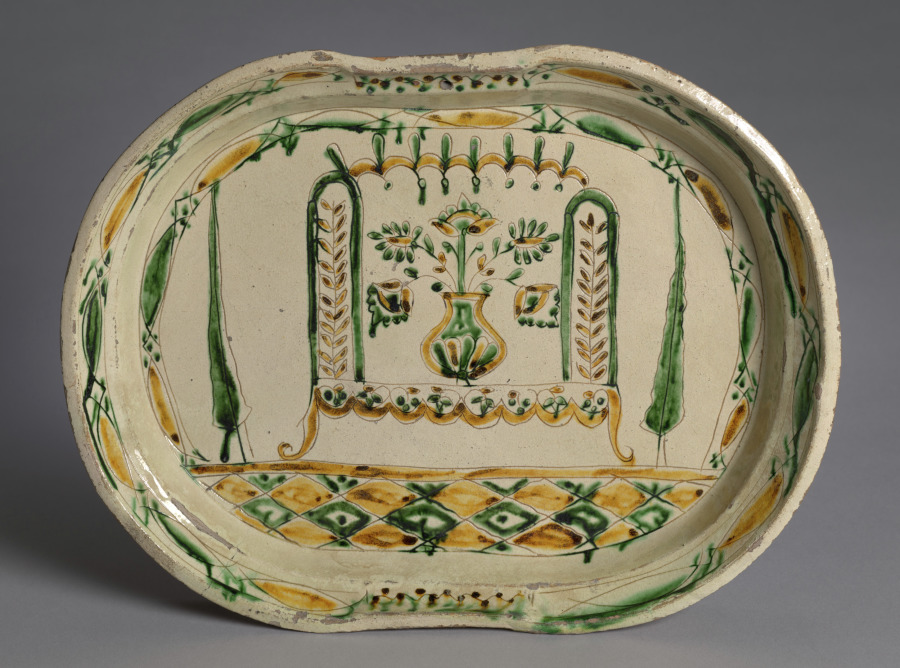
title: Shaving Bowl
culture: Mexico, Guanajuato, 19th century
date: c. 1830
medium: pottery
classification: Ceramic